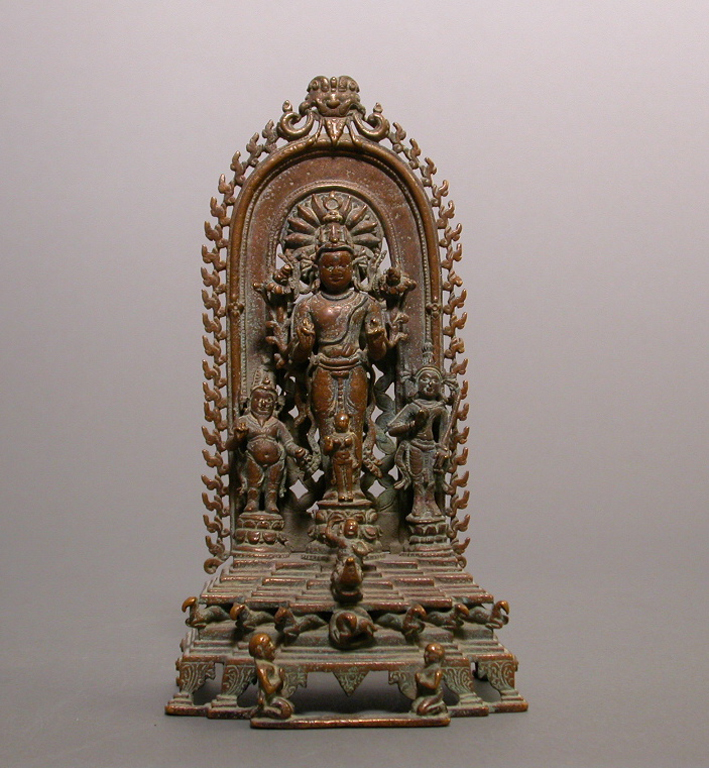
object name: Sculpture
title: Sun God Surya on His Chariot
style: South Asian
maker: Bangladesh or Eastern India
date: Pala period, 10th/12th century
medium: Bronze inlaid with silver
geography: Bangladesh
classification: bronze; metal; sculpture; asian art